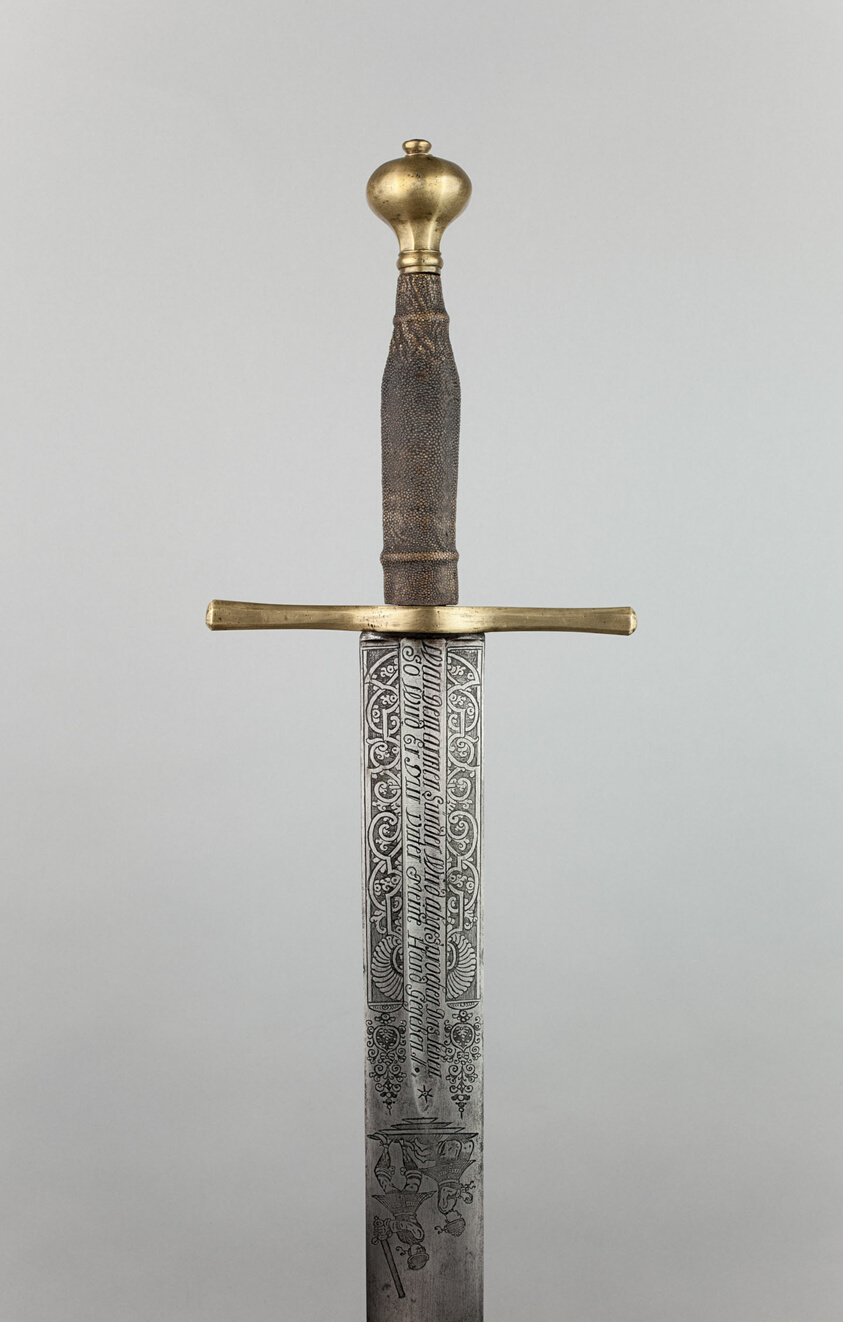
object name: Arms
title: Sword of Justice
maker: German, Solingen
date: late 17th century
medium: Wood, sharkskin, and brass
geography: Solingen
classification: edged weapon-sword; arms; arms and armor